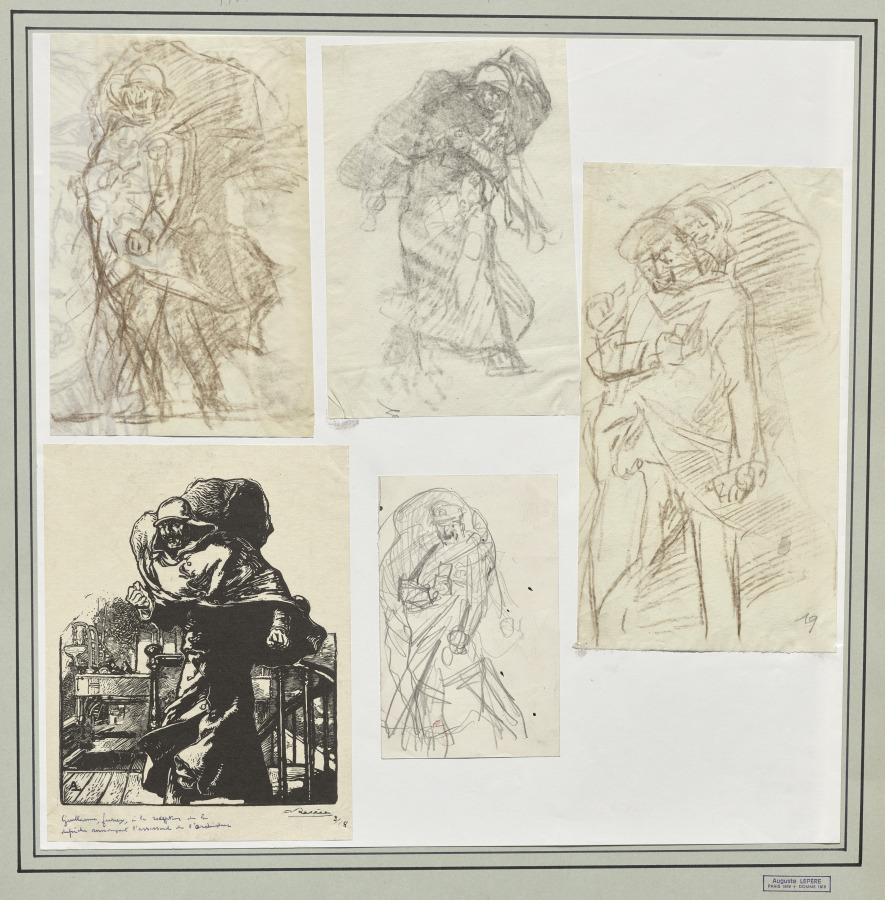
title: L'Empereur Guillaume, furierx...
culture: France, 20th century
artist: Auguste Louis Lepère (French, 1849–1918)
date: 1914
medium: brown chalk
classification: Drawing